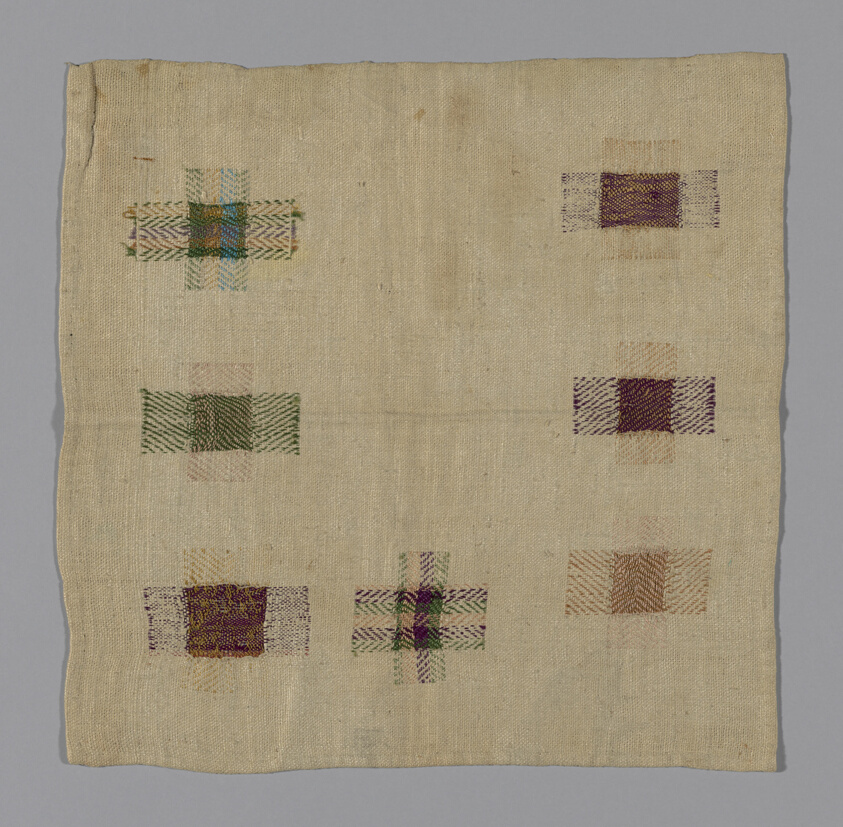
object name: Textile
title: Darning Sampler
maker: Netherlands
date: 19th century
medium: Seven squares of darning in colored silk on white linen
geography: Netherlands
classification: textile; needlework (visual works); weaving; sampler